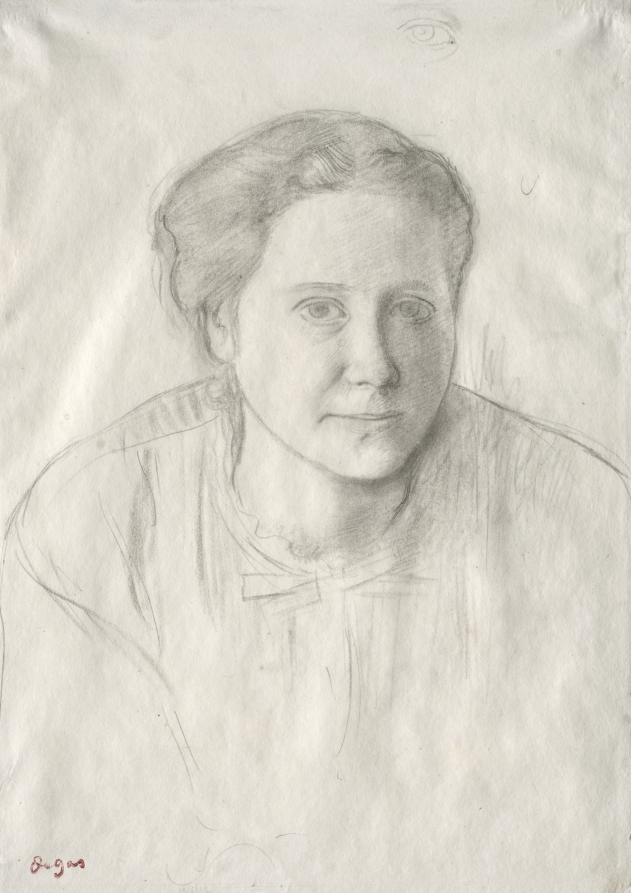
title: Victoria Dubourg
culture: France, 19th century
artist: Edgar Degas (French, 1834–1917)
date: c. 1866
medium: graphite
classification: Drawing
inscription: verso, upper right, in blue crayon: Ph 1756 [underlined]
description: This drawing is one of several studies that Edgar Degas created for a painted portrait of the artist Victoria Dubourg, now in the collection of the Toledo Museum of Art. Here, Degas concentrated on the facial expression of Dubourg, known for her still-lifes of flowers. Attempting to precisely render Dubourg's direct gaze, Degas drew her eyes in greater detail, even adding an additional sketch along the sheet's upper margin.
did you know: Around the time this drawing was made, its subject, Victoria Dubourg, became engaged to the artist Henri Fantin-Latour, also a friend of Degas.